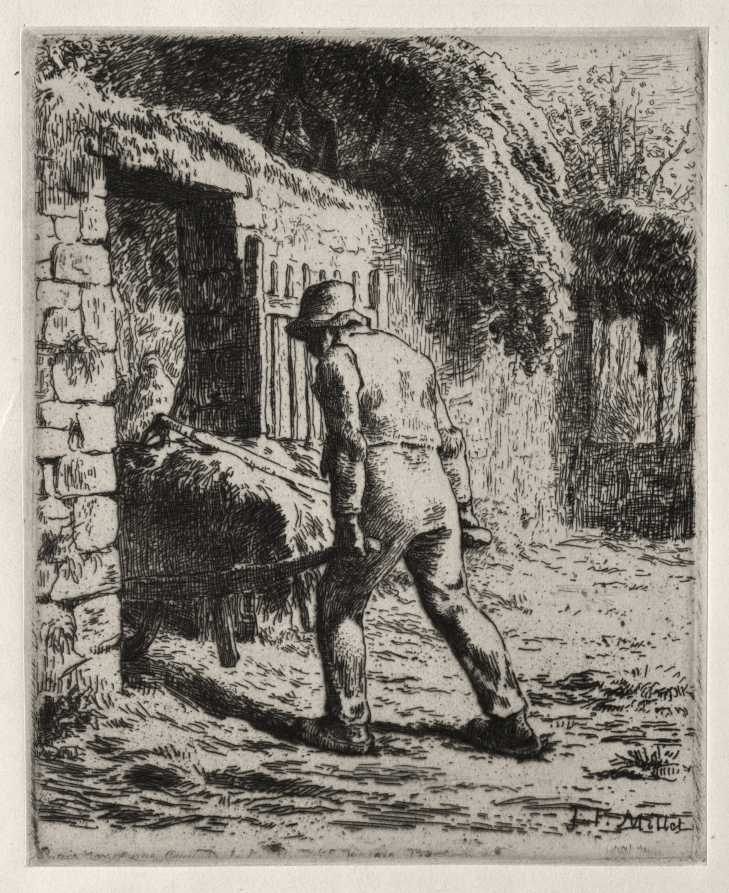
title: Peasant Returning from the Manure Heap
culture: France, 19th century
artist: Jean-François Millet (French, 1814–1875)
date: 1855–56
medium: etching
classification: Print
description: Millet moved from Paris to the nearby village of Barbizon in 1849 in search of rustic subject matter. The group of painters working in the countryside surrounding the Forest of Fontainebleau frequently painted out-of-doors in order to create fresh and accurate views of nature. While most of the Barbizon artists focused primarily on landscape, Millet also represented peasants. His works celebrate the nobility and dignity of people living close to the soil, symbols of the stability and continuity lacking in modern life